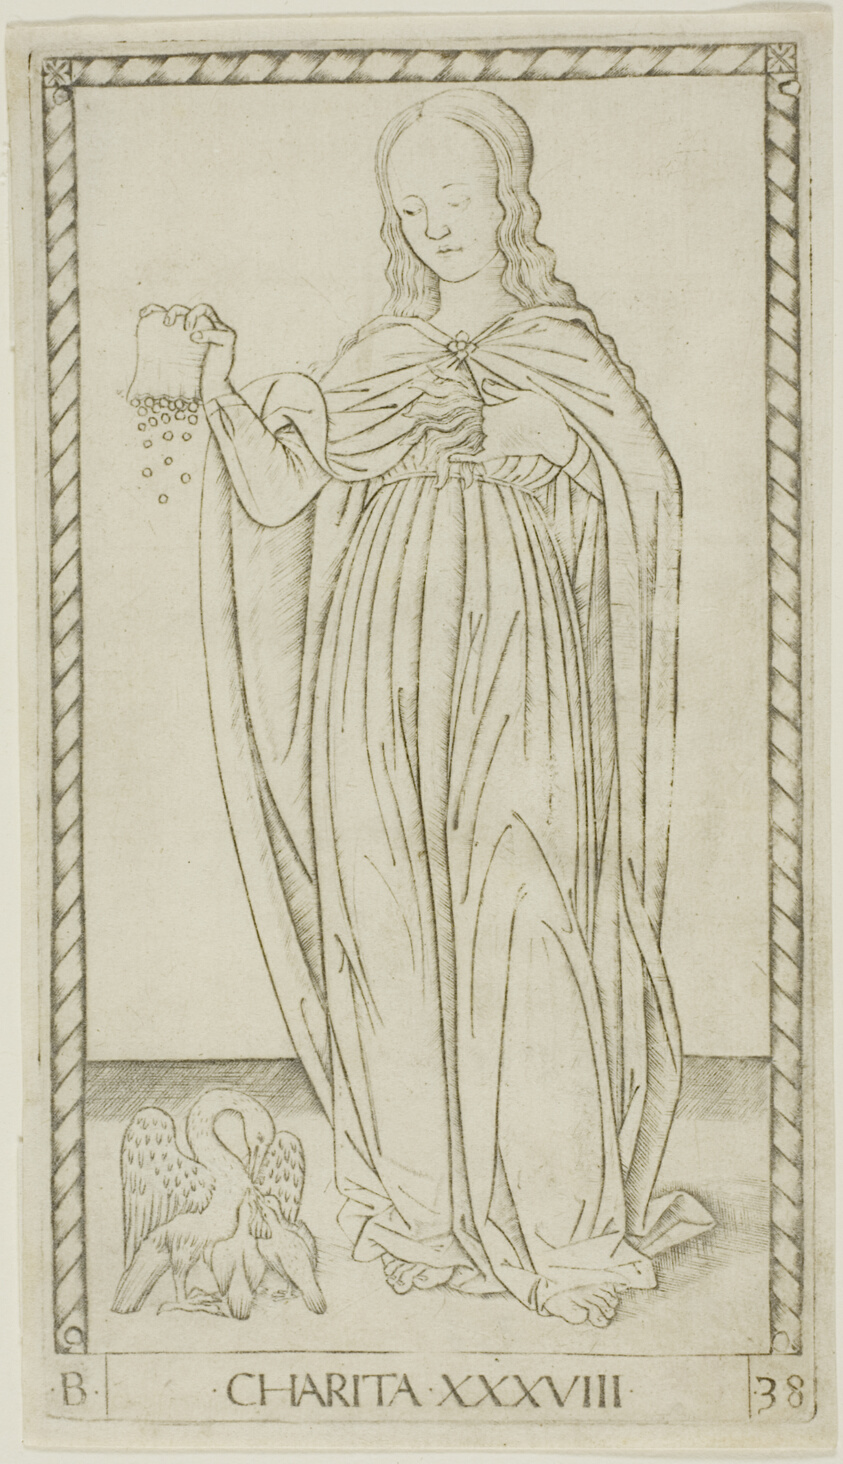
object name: Print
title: Charity, plate 38 from Genii and Virtues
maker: Master of the E-Series Tarocchi (Italian, active c. 1465)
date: c. 1465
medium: Engraving on paper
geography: Italy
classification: engraving; print; prints and drawing